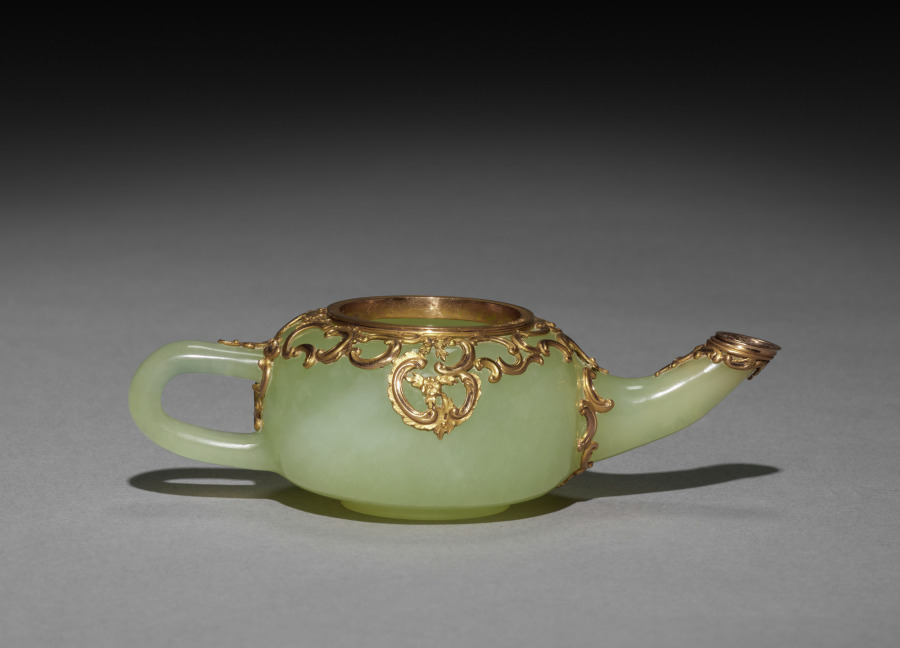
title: Miniature Teapot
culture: Russia, St. Petersburg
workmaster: Mikhail Evlampievich Perkhin (Russian, 1860–1903)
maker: House of Fabergé (Russian, 1842–1918)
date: 1886–96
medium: gold, bowenite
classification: Miniature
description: The House of Fabergé specialized in the creation of little treasures intended as opulent personal gifts. In creating luxurious accessories for a desk or tabletop, Fabergé often used native hardstones such as multicolored agate and quartz, green nephrite, pink rhodonite, rock crystal, and pale green bowenite found in the Ural Mountains of western Russia. Fabergé's designers often paired hardstones with gold mounts, particularly in the St. Petersburg workshop where the goldsmiths were concentrated.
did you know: Sometimes called "new jade," bowenite is actually considered a semi-precious gemstone. Though Fabergé obtained his supply from the Ural Mountains of Russia, bowenite is also the state mineral of Rhode Island.